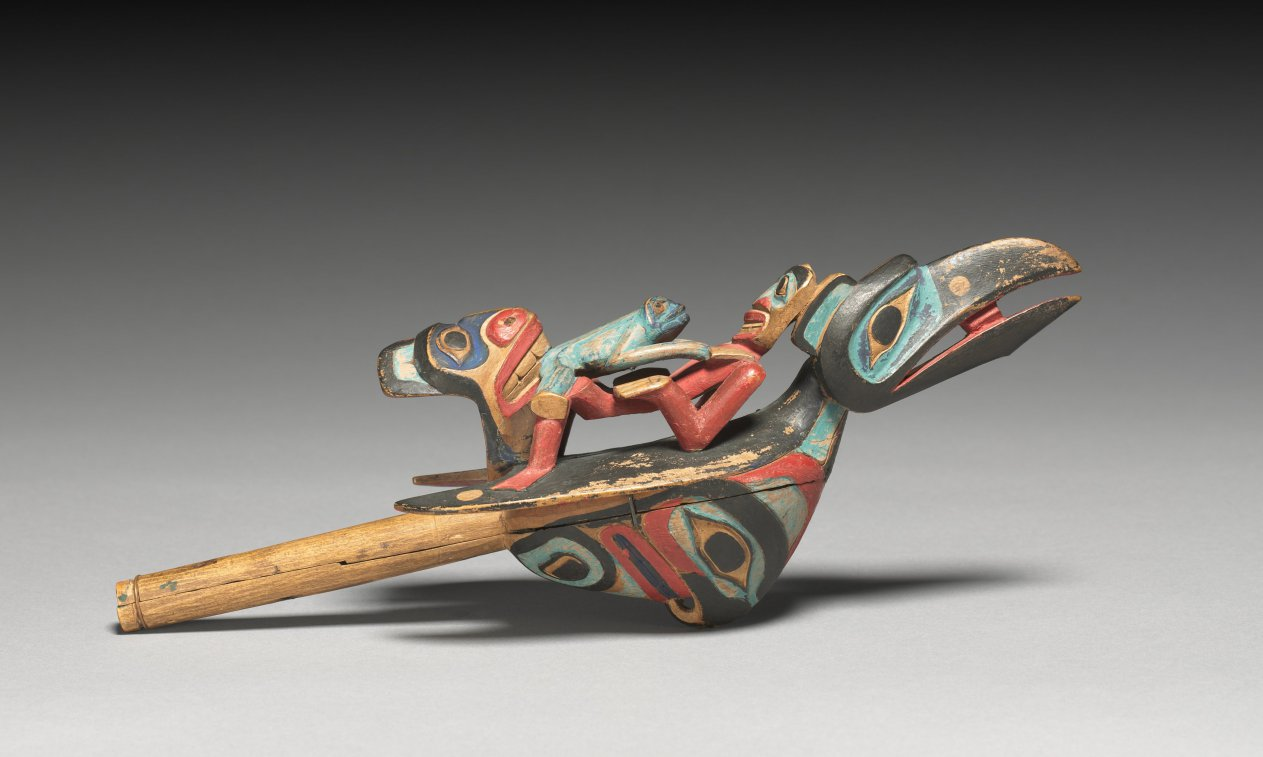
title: Raven Rattle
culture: Native North America, Northwest Coast, British Columbia and Alaska, Haida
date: late 1800s–early 1900s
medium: wood, pigment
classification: Wood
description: Rattles featuring ravens with figures on their backs may depict the acts of shamans, whose exceptional abilities allow them to interact with other-than-human beings to control weather, heal illness, or locate animals for the hunt. Such rattles may have started with shamans but secular chiefs often use them during winter ceremonies, implying they are symbols of power.